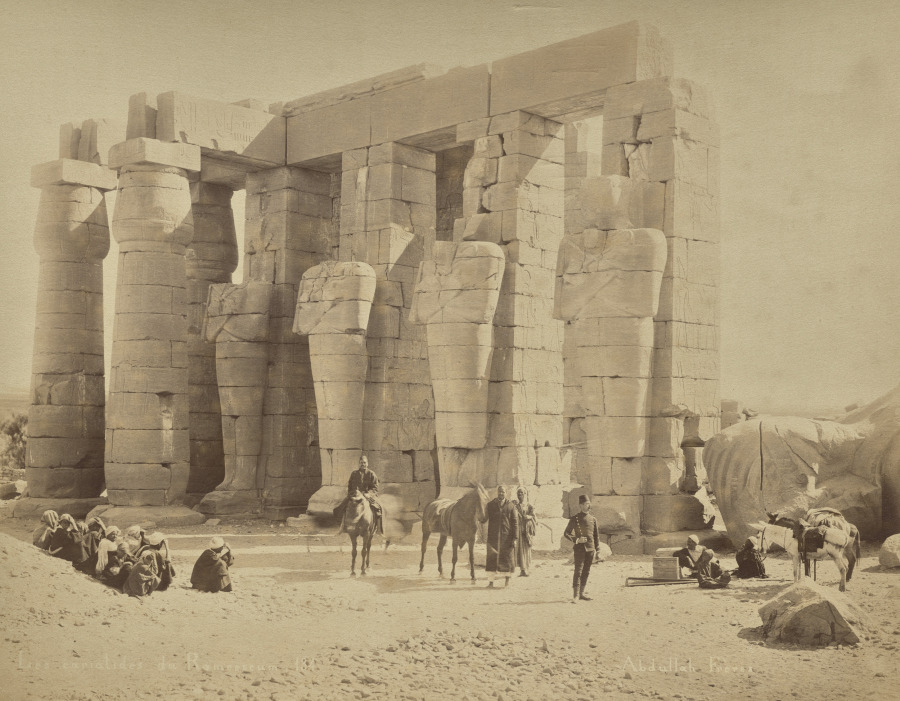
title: Les cariatides du Ramesseum 134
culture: Turkey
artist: Abdullah Frères (Turkish, 1858–1899)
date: 1860–80s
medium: albumen print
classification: Photograph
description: This photograph of the ruins of the memorial temple of Egyptian pharaoh Ramesses the Great was produced by Abdullah Frères, a studio run by three brothers. Based in Istanbul, it was the most celebrated photographic studio in the Ottoman Empire. This depiction of the sculptures of Osiris and the pharaoh echoes and complements views of these sculptures by British photographer Francis Frith (1992.236) and French photographers Henri Béchard (2006.118) and Adolphe Braun (1992.244).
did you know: While Britain maintained a significant military and commercial presence in Egypt in the nineteenth century, the country was ruled by the Ottoman Empire.